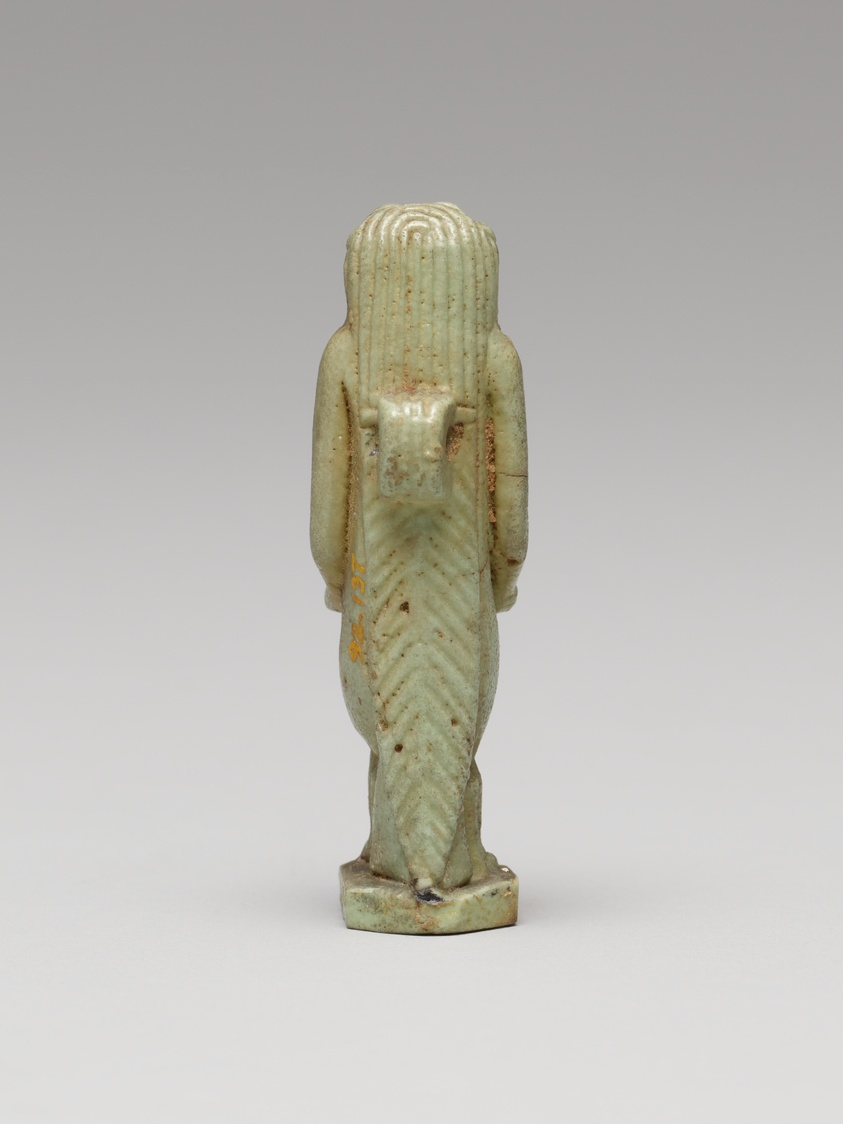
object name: Costume and Accessories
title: Amulet of Taweret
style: third intermediate period, egyptian, ancient, late period (egyptian)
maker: Egyptian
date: Third Intermediate Period–Late Period (about 1069–332 BCE)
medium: Faience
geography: Egypt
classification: amulet; ceramics; jewelry; ancient art; costume; faïence (composite material)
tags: goddesses